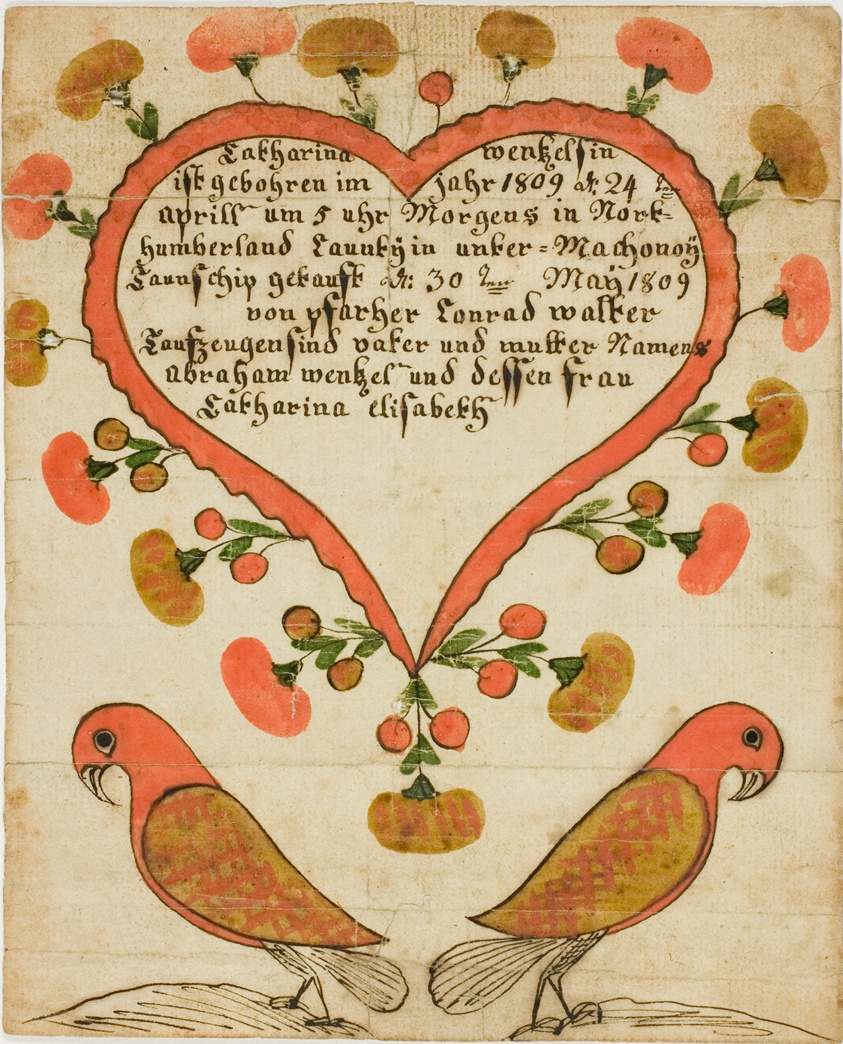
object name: Drawing and Watercolor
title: Baptismal Certificate of Catharina Wentzelsin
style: 19th century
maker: Unknown American artist; Northumberland County, Pennsylvania, active 19th century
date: April 24, 1809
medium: Watercolor on paper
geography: United States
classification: watercolor; drawings (visual works); prints and drawing; paper